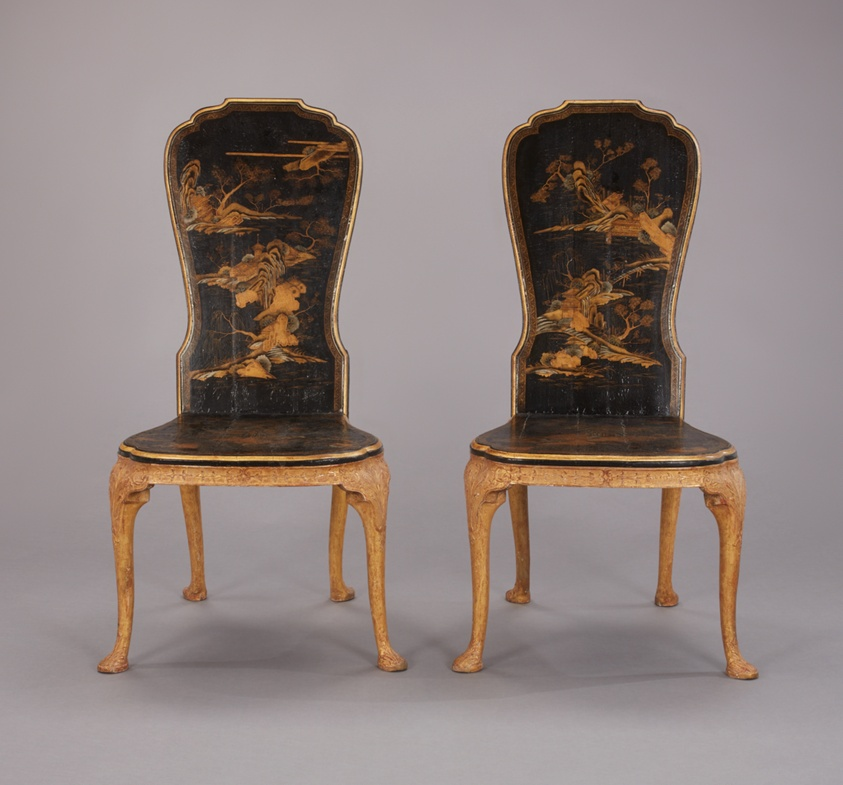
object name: Furniture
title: Pair of Hall Chairs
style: Baroque, chinoiserie, georgian, 18th Century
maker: China (lacquer back and seat panels) and England (frame)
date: 1720-30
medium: Frames: gilt gesso on beechwood; Backs and seats: lacquered and gilt Chinese softwood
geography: England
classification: chair; furniture; seating; european decorative arts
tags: landscapes, rocks